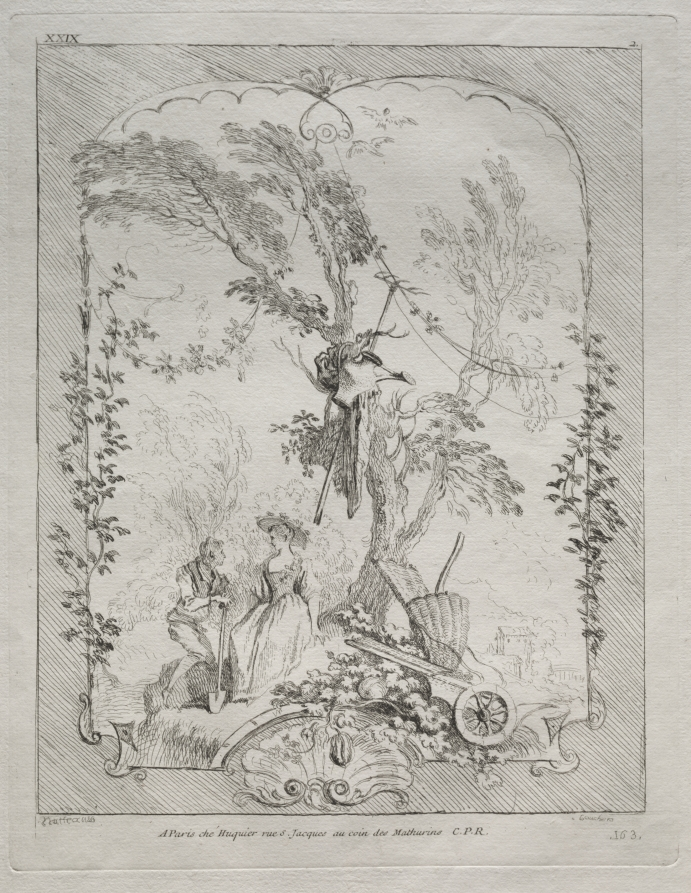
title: The Proposal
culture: France, 18th century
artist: François Boucher (French, 1703–1770)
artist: after Jean-Antoine Watteau (French, 1684–1721)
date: c. 1726–35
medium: etching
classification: Print